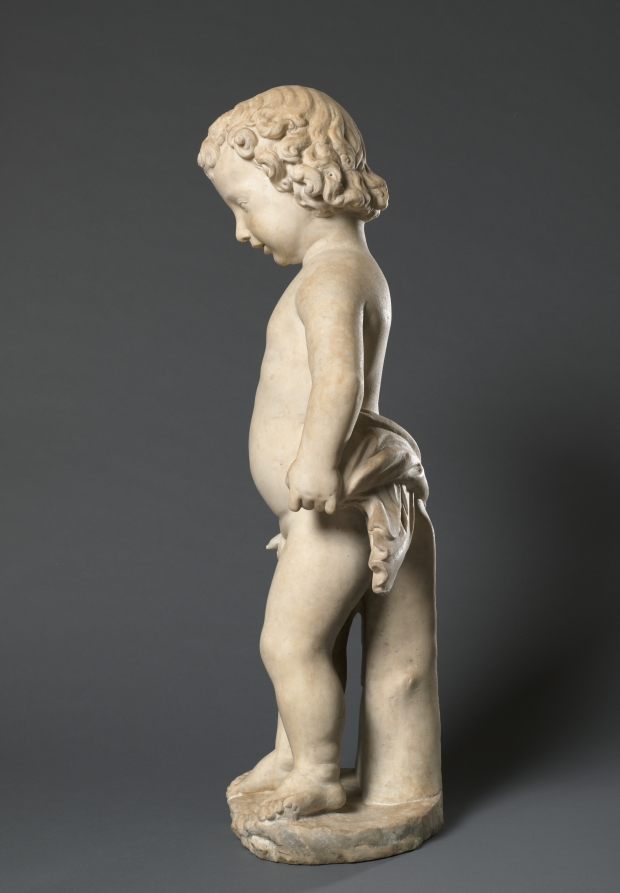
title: Christ Child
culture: Italy, Florence, 15th century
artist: attributed to Michele (di Luca) Marini (Italian)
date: c. 1490–1500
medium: marble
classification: Sculpture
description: This sculpture is an enlarged version of Desiderio da Settignano's figure of about 1460 at the top of his tabernacle in the Church of San Lorenzo in Florence. There are many replicas of Desiderio's work. This example is an especially fine one, undoubtedly intended for the interior of a church.